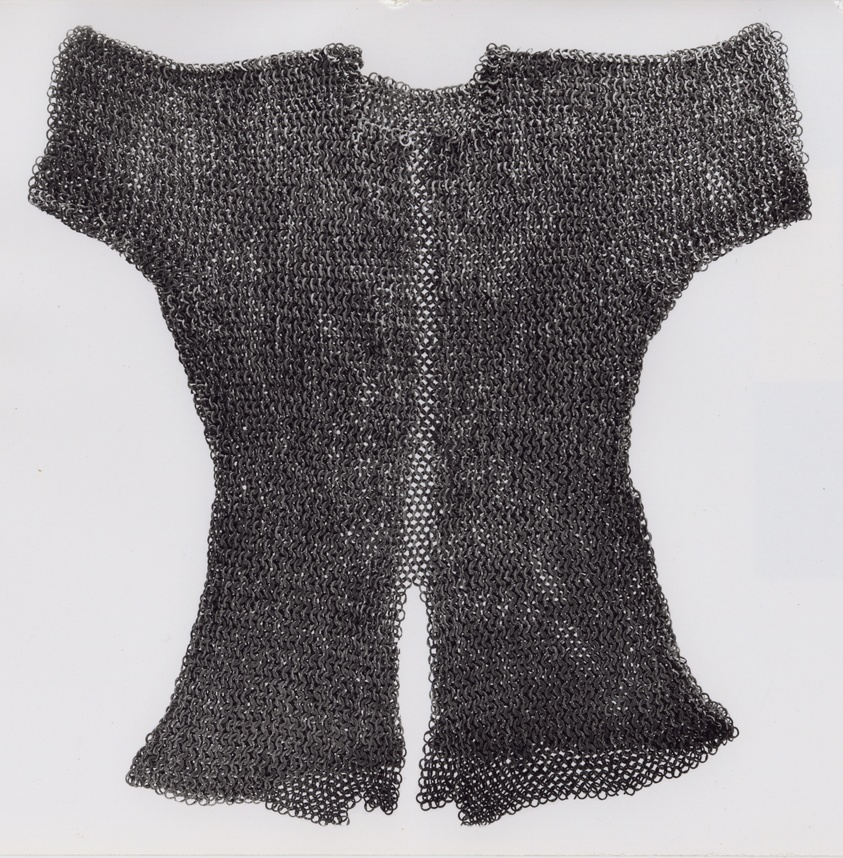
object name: Armor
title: Shirt of Mail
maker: European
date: c. 1400 (?)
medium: Steel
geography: Europe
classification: suit-element; armor; arms and armor